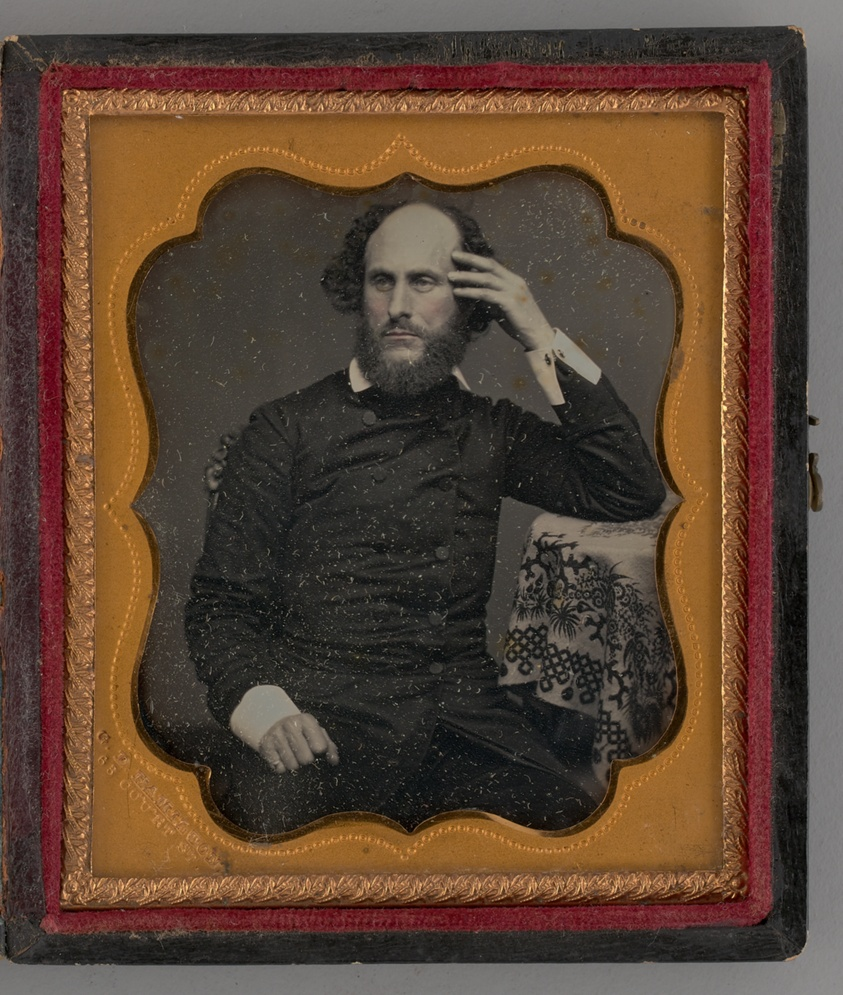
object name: Photograph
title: Untitled (Portrait of Man)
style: 19th century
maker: George D. Hamilton (American, 19th century)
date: 1857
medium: Daguerreotype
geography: United States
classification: portrait; photograph; photographic process; photography; portrait; daguerreotype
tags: lundberg collection, portraits, portraits: male subject